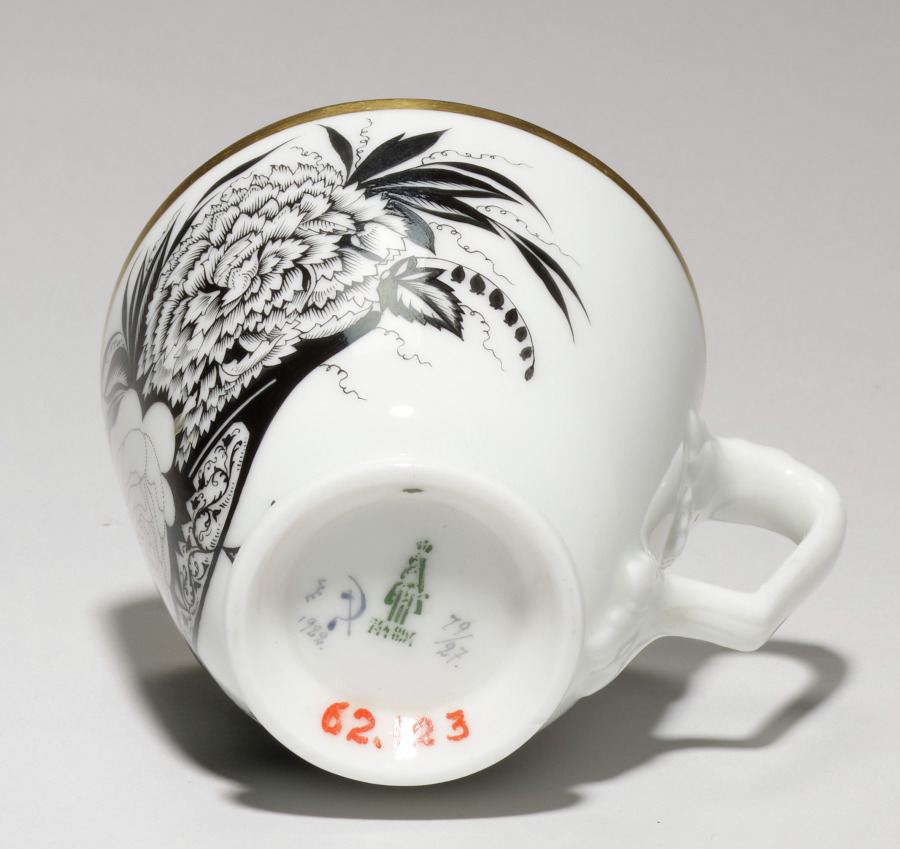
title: Cup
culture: Russia, St. Petersburg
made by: St. Petersburg Imperial Porcelain Factory (Russian)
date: 1881–1917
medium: porcelain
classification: Ceramic